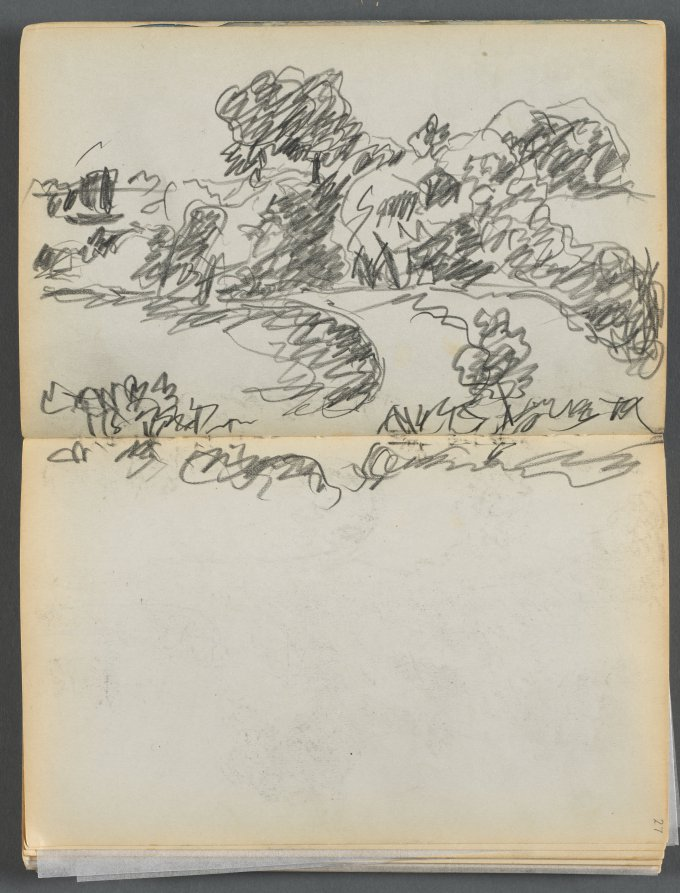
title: Sketchbook- The Granite Shore Hotel, Rockport, page 026 & 27: Harbor View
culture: America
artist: Maurice Prendergast (American, born Newfoundland [now Canada], 1858–1924)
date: 1905–10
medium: graphite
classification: Bound Volume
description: This sketchbook contains 72 pages of pencil drawings and 9 watercolors of Cape Ann. On the inside of the cover Prendergast wrote the address of the Granite Shore Hotel in Rockport, Massachusetts.